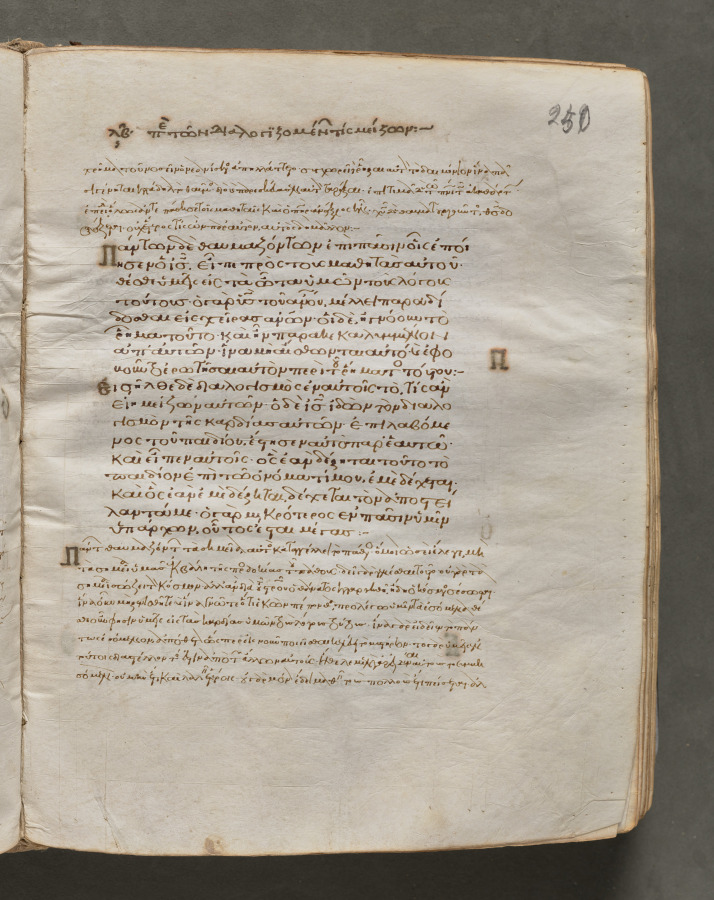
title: Text, folio 250 (recto), from a Gospel Book with Commentaries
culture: Byzantium, Constantinople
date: c. 1000–1100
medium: ink, tempera, and gold on vellum; leather binding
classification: Bound Volume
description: Each of the four gospels in this book opens on a page with brilliantly illuminated borders depicting the author of the text as well as birds—principally peacocks, symbols of the immortality of the soul—and fountains, representing the fountain of life and the salvation of the soul. This volume consists of 428 leaves with texts in Greek. Its level of sophistication suggests that it was probably written and decorated in a monastery in Constantinople.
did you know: Gospel books were carried in procession through Byzantine churches.